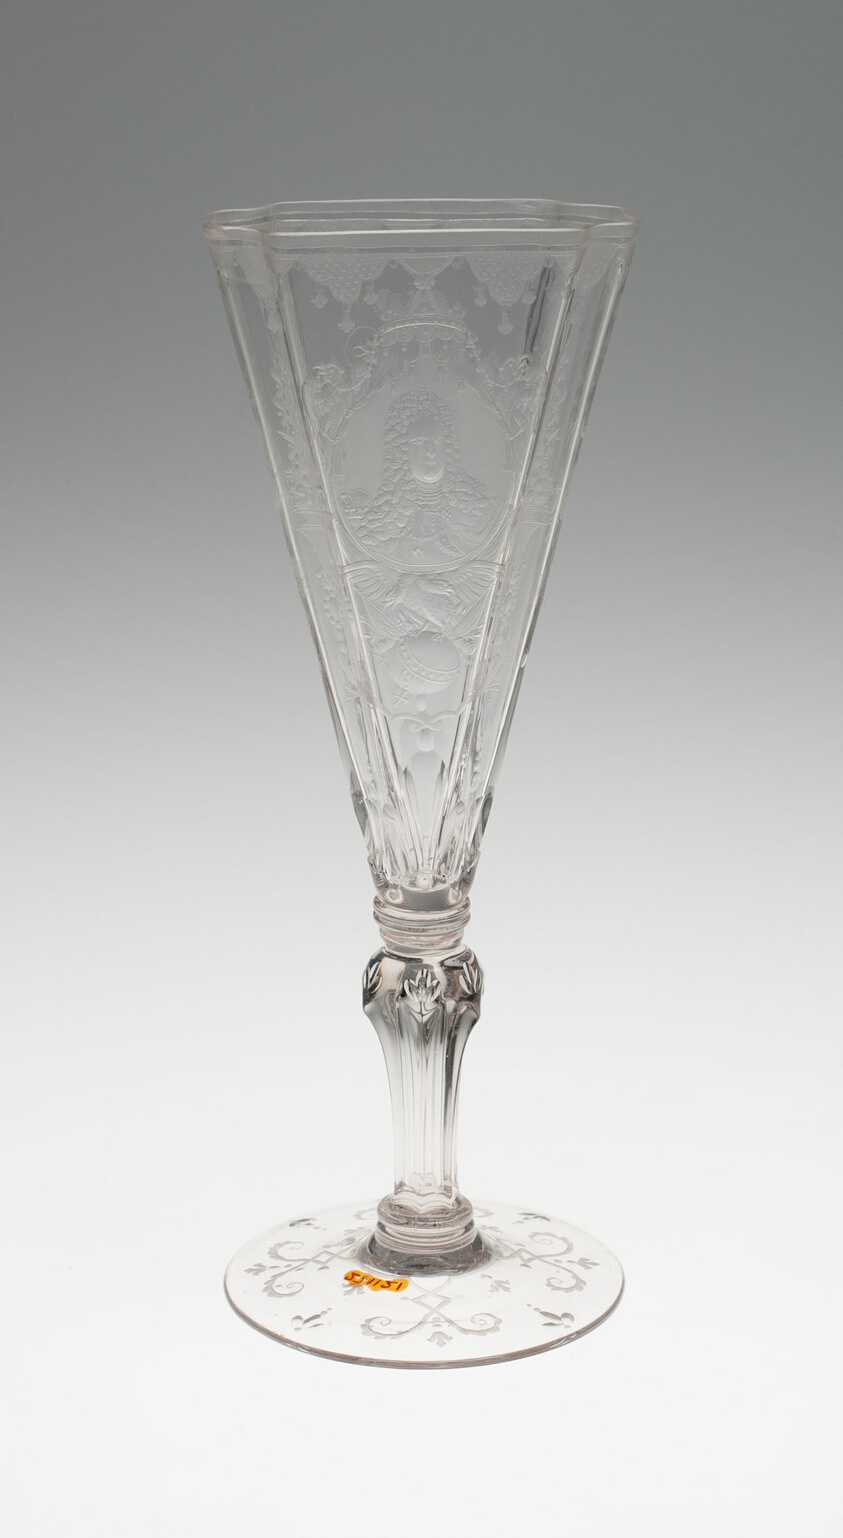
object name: Glass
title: Goblet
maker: Schleswig, Germany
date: c. 1725/30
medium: Glass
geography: Schleswig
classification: drinking vessel; glass; european decorative arts